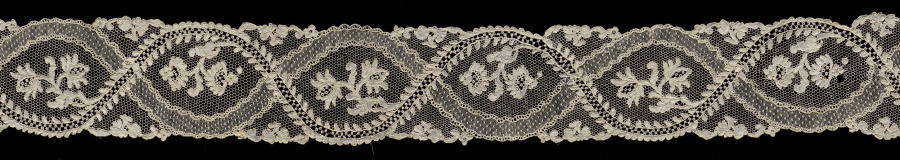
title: Lace Lappet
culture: France, Argentan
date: 1715–74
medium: Linen: needle lace (Point de Argentan)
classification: Lace